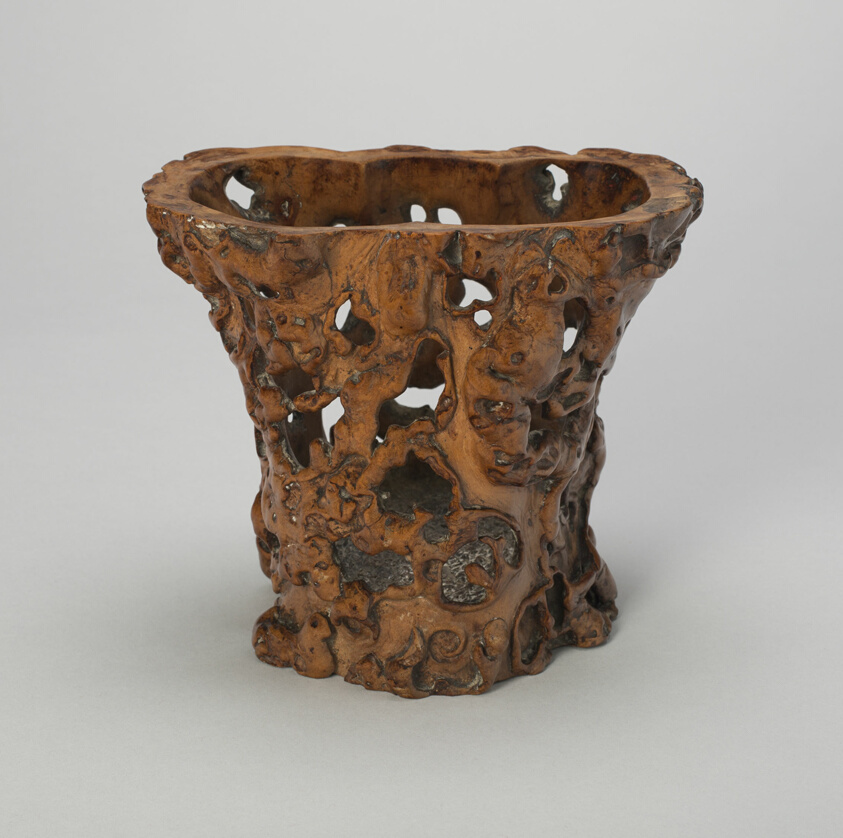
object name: Vessel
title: Brushpot (bitong)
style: Chinese (culture or style)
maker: China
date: Qing dynasty (1644–1911), 18th century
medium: Rootwood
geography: China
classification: writing equipment; household accessory; container; vessel